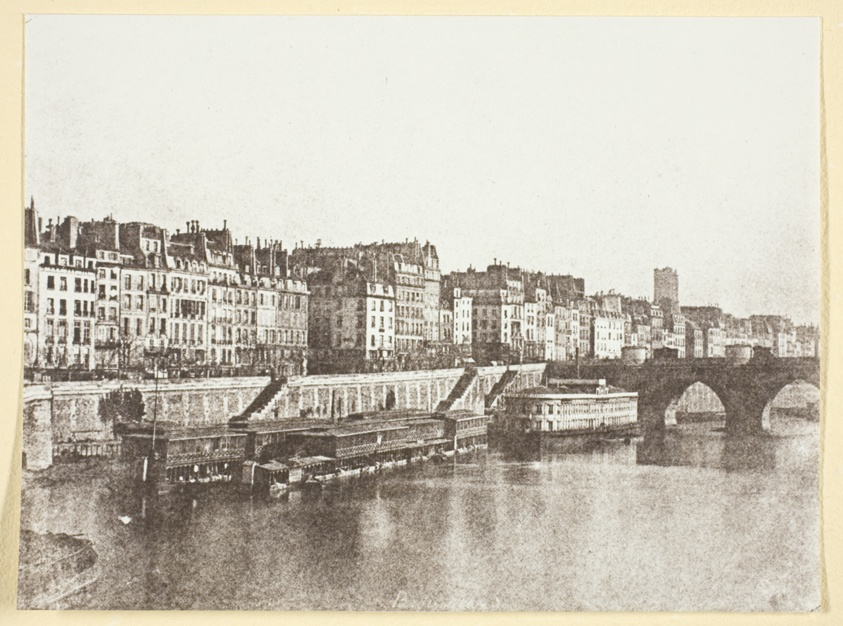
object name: Photograph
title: Le Pont-Neuf, les quais, les bains "A la Samaritaine" et la Tour St Jacques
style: 19th century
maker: Hippolyte Bayard (French, 1801–1887)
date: 1847, printed 1965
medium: Gelatin silver print, No. 14 from the portfolio "Bayard: XXV Calotypes, 1842-1850" (1965)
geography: France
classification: photographic process; photography; photograph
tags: Collected by Hugh Edwards